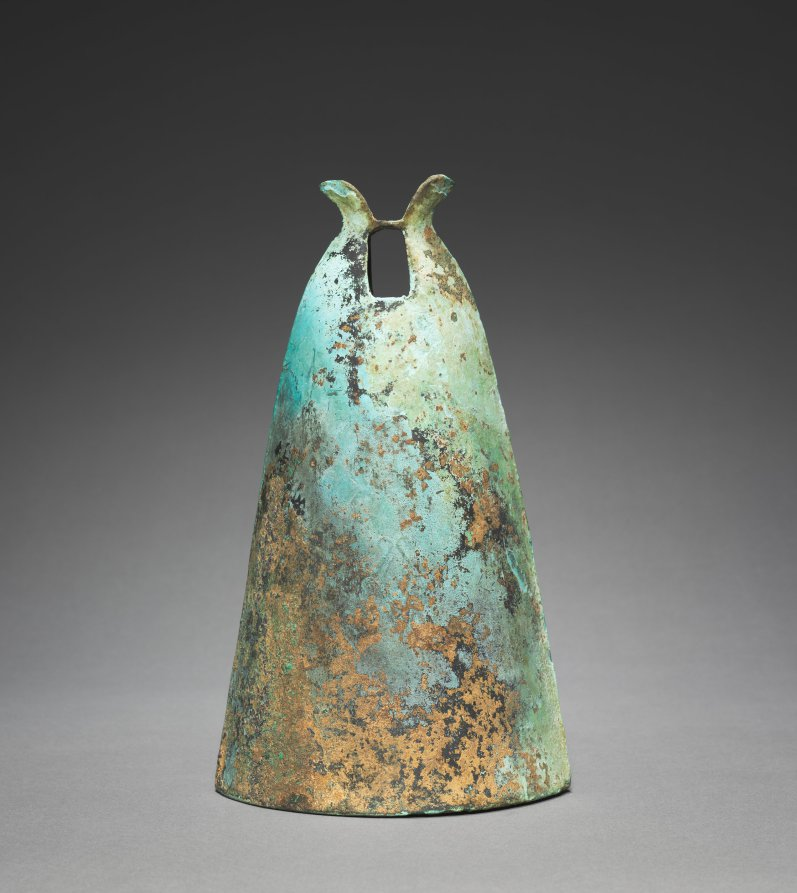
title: Bell with Diamond-Shaped Insignia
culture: China, along the southern borders, Eastern Zhou dynasty (770–256 BCE) to Han dynasty (202 BCE–220 CE)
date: 300s–100s BCE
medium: bronze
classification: Metalwork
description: These rare, elegant bronze bells were made in a tribal village along the southern borders of China. They differ greatly from bells made in the central regions, which often come in large sets and in varying sizes, and feature complex decorative patterns. The distinctive shape of these bells resembles a tall helmet topped by a pair of horns. A rope may have been tied around the horns so that the bells could be suspended. Each bell is decorated with a diamond-shaped insignia—probably to mark tribal affiliation. Although the bells are identical in size, each produces a different tone, which indicates that their casting was a highly refined process.